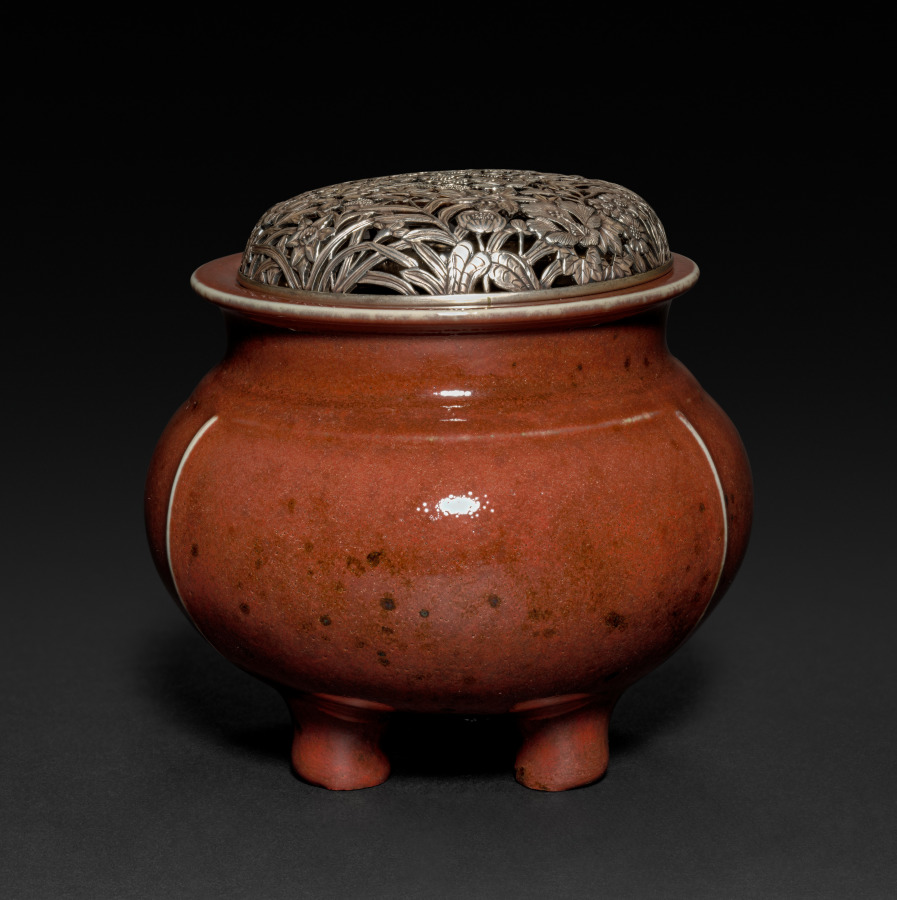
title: Incense Burner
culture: Japan, Meiji period (1868–1912)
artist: Seifū Yohei III (Japanese, 1851–1914)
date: 1893–97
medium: Porcelain with molded design, crimson glaze, and floral openwork silver lid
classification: Ceramic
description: Seifū Yohei III made incense burners in a wide variety of designs and styles. Their silver lids were produced outside the studio by metalwork specialists. This tripod incense burner has a distinctive red-colored glaze and linear molded decorations that run around the base of the collar and down the legs.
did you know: Seifū Yohei III’s incense burner with a variety of flowers on its lid has a glaze described as “crimson glaze” (kōyū); it is also dappled with dark spots of varied opacity and tiny pores throughout, which gives the container a rich, textured effect.